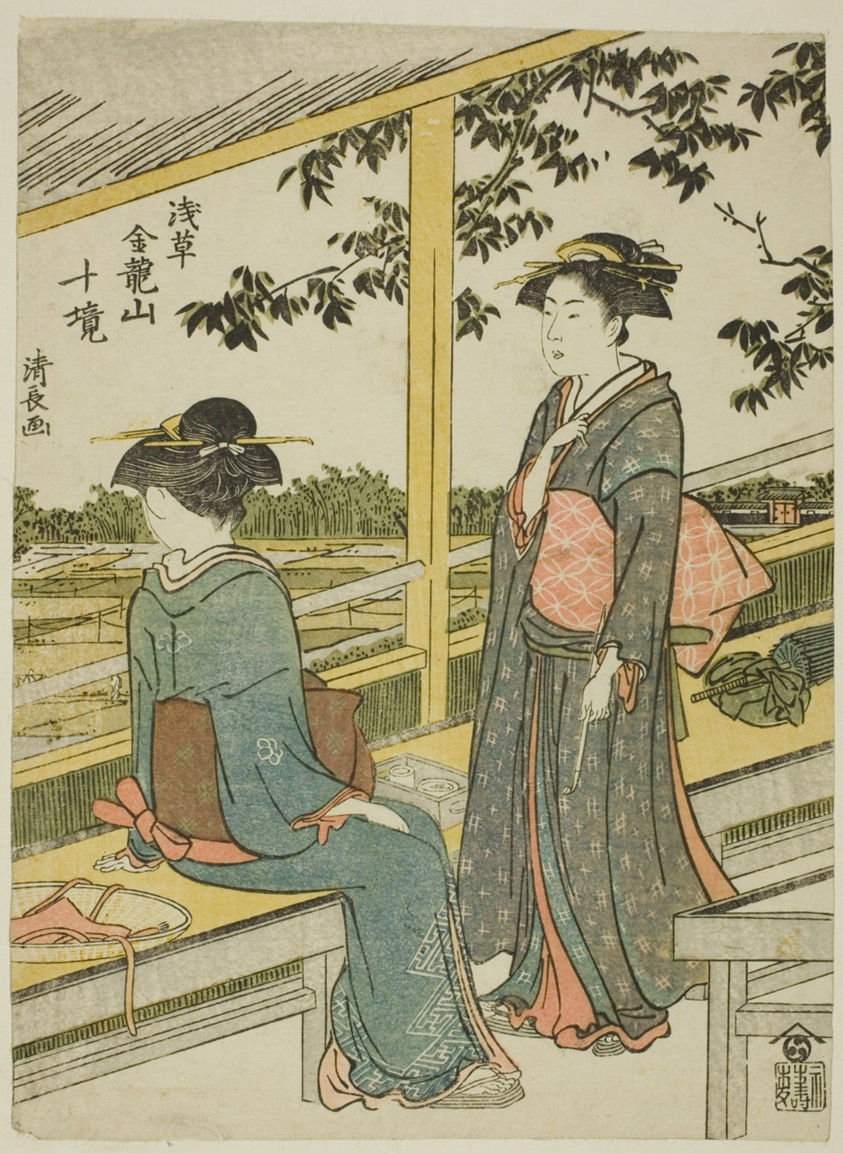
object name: Print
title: Teahouse overlooking rice fields, from the series "Ten Precincts of Kinryuzan Temple in Asakusa (Asakusa Kinruzan jikkei)"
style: Japanese (culture or style)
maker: Torii Kiyonaga (Japanese, 1752-1815)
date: c. 1783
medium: Color woodblock print; koban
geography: Japan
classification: woodblock print; print; asian art